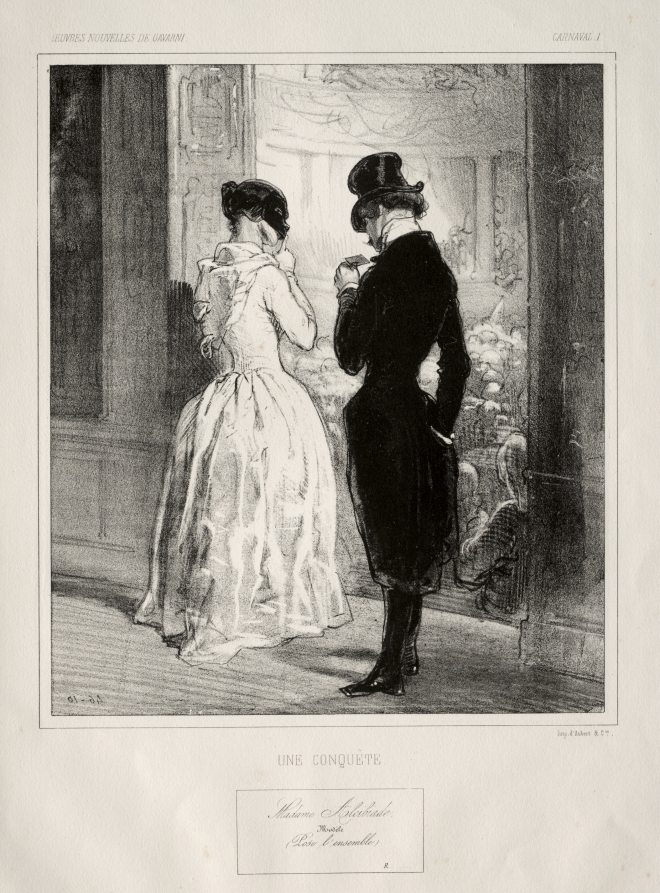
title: Carnaval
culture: France, 19th century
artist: Paul Gavarni (French, 1804–1866)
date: c. 1841–47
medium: lithograph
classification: Print